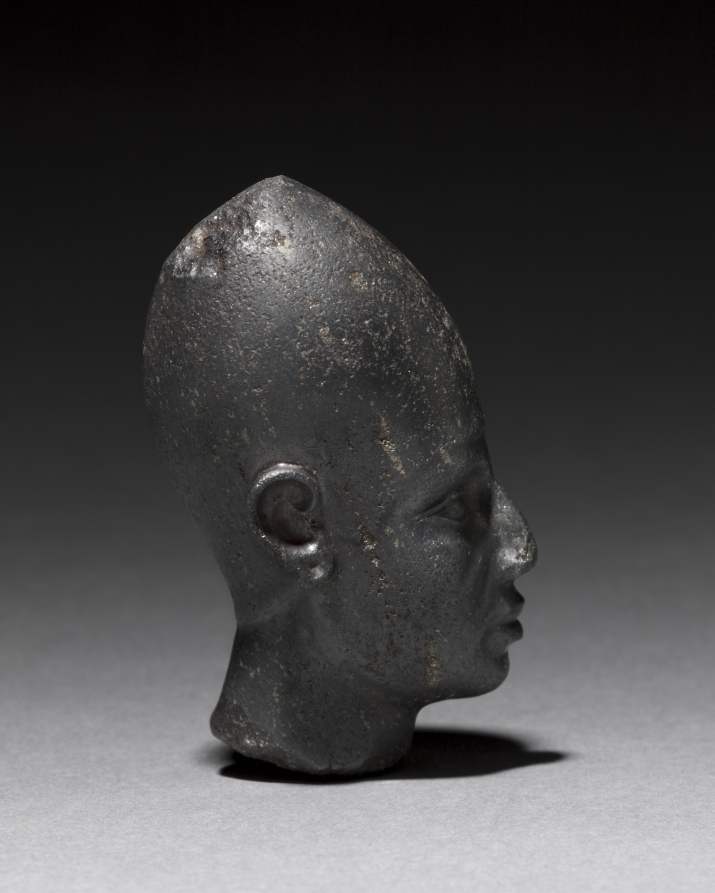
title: Head of Foreign God or Prince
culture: Egypt or Syria, New Kingdom (1540–1069 BCE), Dynasty 18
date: c. 1320 BCE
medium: black magnetite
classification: Sculpture